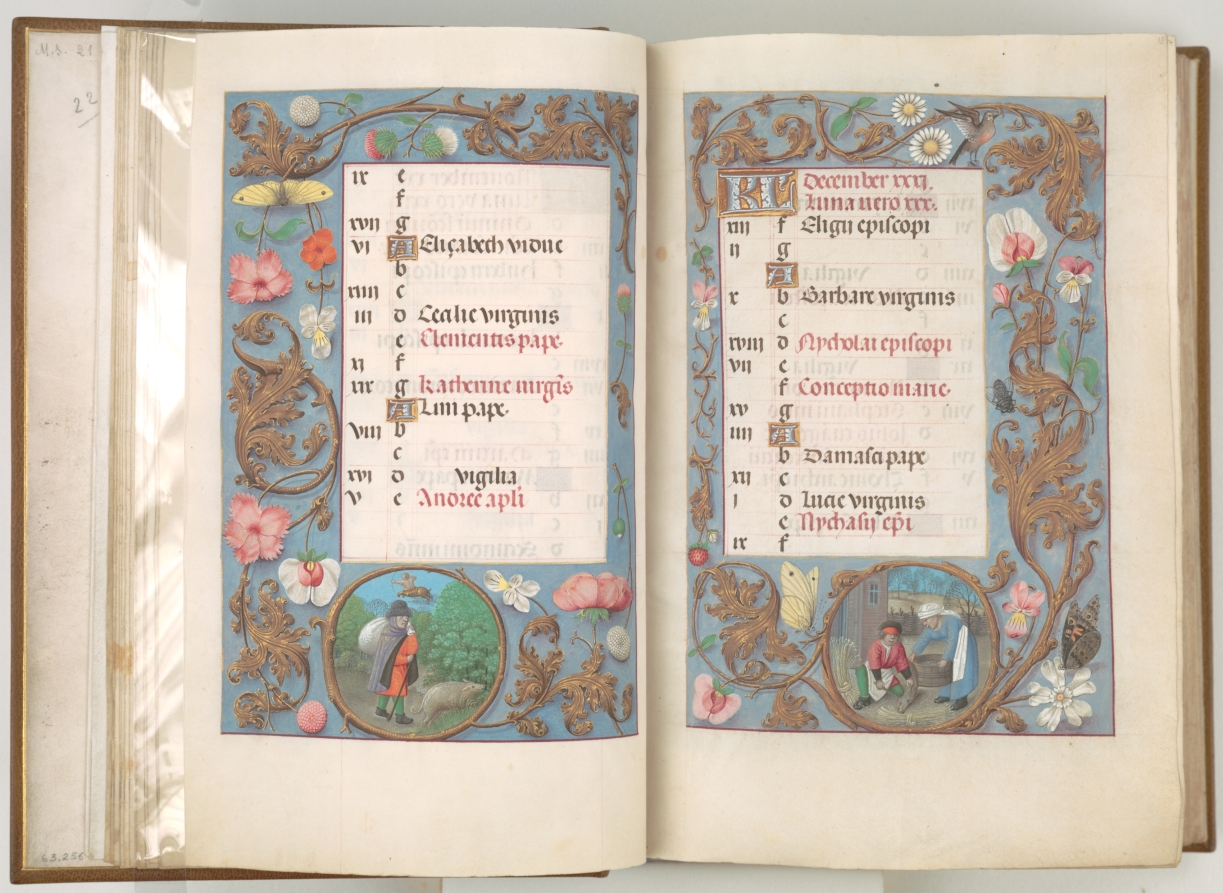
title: Hours of Queen Isabella the Catholic, Queen of Spain: Fol. 13r, December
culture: Flanders, Ghent and Bruges, late 15th century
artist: Master of the First Prayerbook of Maximillian (Flemish, c. 1444–1519)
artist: and Associates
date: c. 1500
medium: ink, tempera, and gold on vellum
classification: Bound Volume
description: This manuscript was illuminated by a circle of at least five highly organized manuscript painters active in the Flemish cities of Ghent and Bruges. The principal illuminator was Alexander Bening, who painted the majority of the book's miniatures. Manuscripts produced by this circle of artists are renowned for the decoration of their borders, which typically feature a rich variety of realistically-painted flowers, birds, and butterflies. This prayer book, called a book of hours, was intended not for a cleric, but for the private devotions of a lay person-in this case, Isabella the Catholic, Queen of Spain (1451-1504). Isabella's coat of arms embellishes the book's frontispiece. It is unlikely that the book was commissioned by the Queen herself; rather, she probably received it as a diplomatic gift from someone courting her patronage, perhaps Cardinal Francisco Jimenez de Cisneros. A Franciscan friar, Jimenez was dependent upon Isabella for his advancement, first to the post of Queen's confessor in 1492, and then to Archbishop of Toledo in 1495.